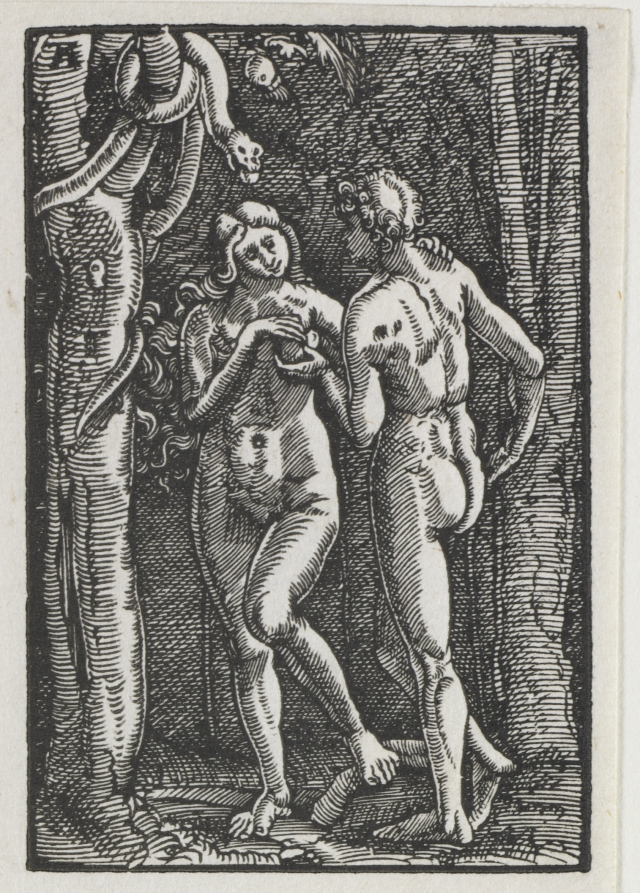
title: The Fall and Redemption of Man: Adam and Eve Eating the Forbidden Fruit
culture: Germany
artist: Albrecht Altdorfer (German, c. 1480–1538)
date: c. 1513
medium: woodcut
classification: Print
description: These eight woodcuts come from a series of forty which illustrate the story of Christian redemption from original sin to the Last Judgement. Probably to maximize printing efficiency and quality, eight woodblocks were printed on each of five sheets of paper, but the subjects are not in the correct chronological order. Prior to sale, the sheets were cut into eight pieces. The sheets in the museum's set were only cut in half, preserving four prints per page. The numbers after the titles of the individual images indicate each scene's place within the narrative. By 1513, Altdorfer had already executed a number of small, finely detailed engravings. Because it is difficult to achieve the same degree of precision using woodcut, The Fall and Redemption of Man is a technical tour de force. Probably inspired by Albrecht Dürer's Small Passion (1511)-but almost double the size-the only contemporaneous comparable set of fine miniature woodcuts, Dance of Death, was designed by Hans Holbein in about 1526 (on view nearby).